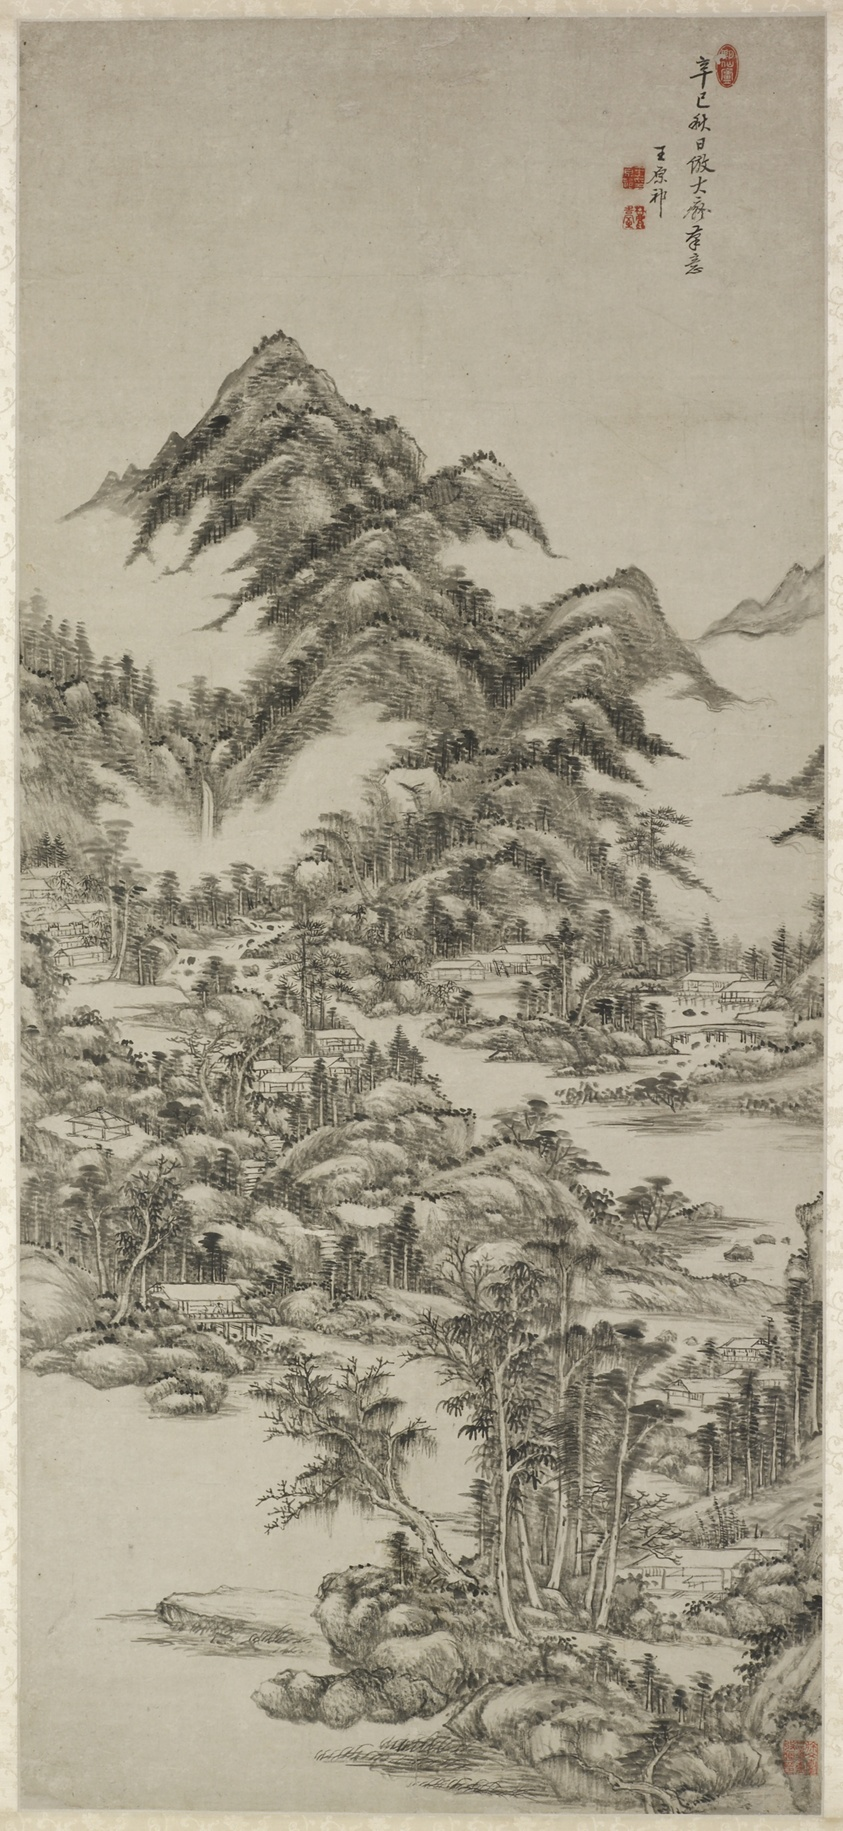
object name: Painting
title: Landscape after Huang Gongwang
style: Chinese (culture or style)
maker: Wang Yuanqi (Chinese, 1642-1715)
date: Qing Dynasty (1644–1911); dated 1701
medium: Hanging scroll; ink and color on paper; with box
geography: China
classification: hanging scroll; painting; asian art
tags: landscapes